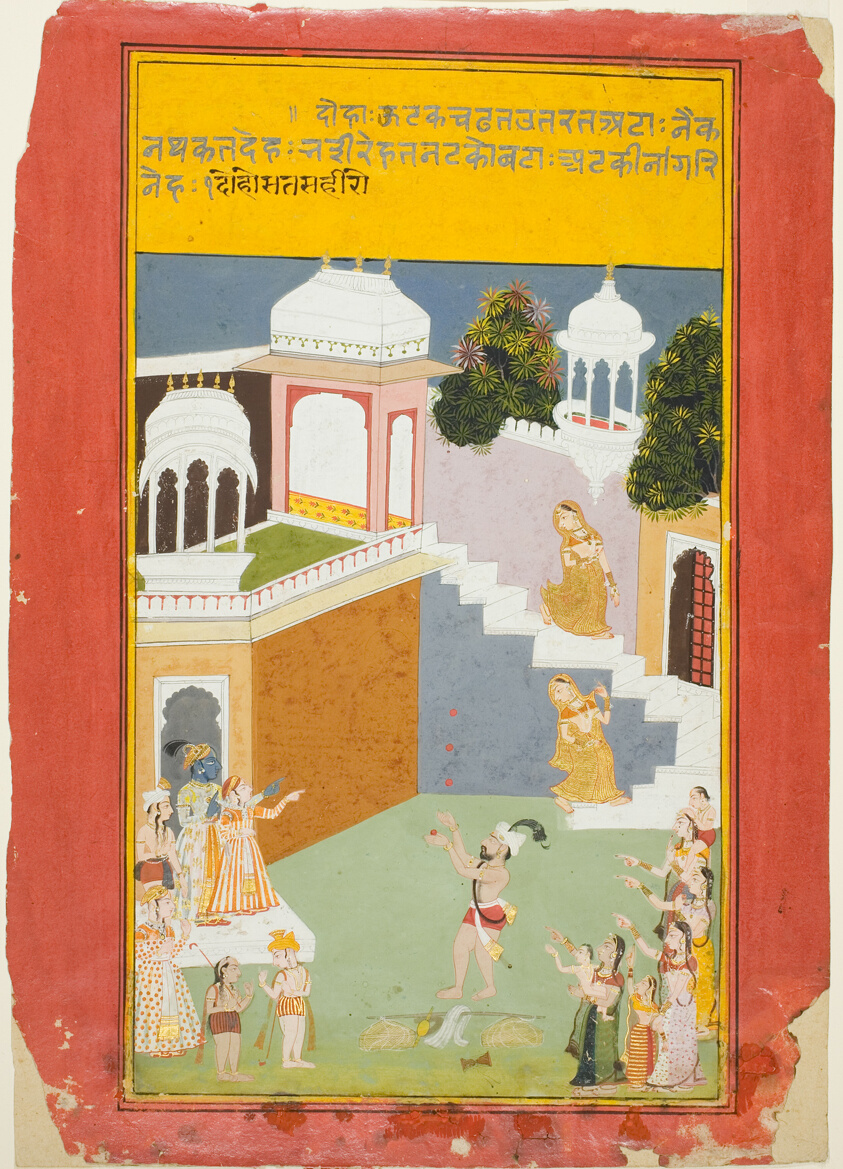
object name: Painting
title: Krishna Watches a Juggler, from a copy of the Seven Hundred Verses (Sat Sai) of Bihari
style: South Asian, mewar, rajasthani, rajput, Indian (South Asian), asian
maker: India; Rajasthan, Mewar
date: c. 1750-1790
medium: Opaque watercolor and gold on paper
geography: India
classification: miniature painting; painting; asian art